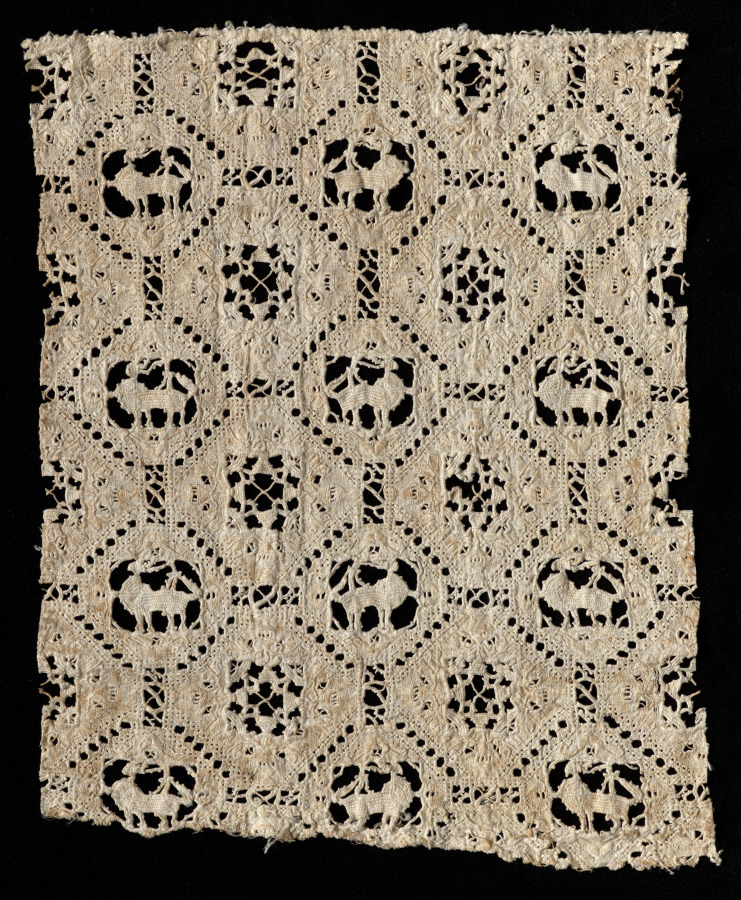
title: Lace Fragment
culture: Italy, Venice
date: 1500s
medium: Linen: needle lace (cutwork) and embroidery; curl stitch (punto riccio) and satin stitch (punto reale)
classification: Lace